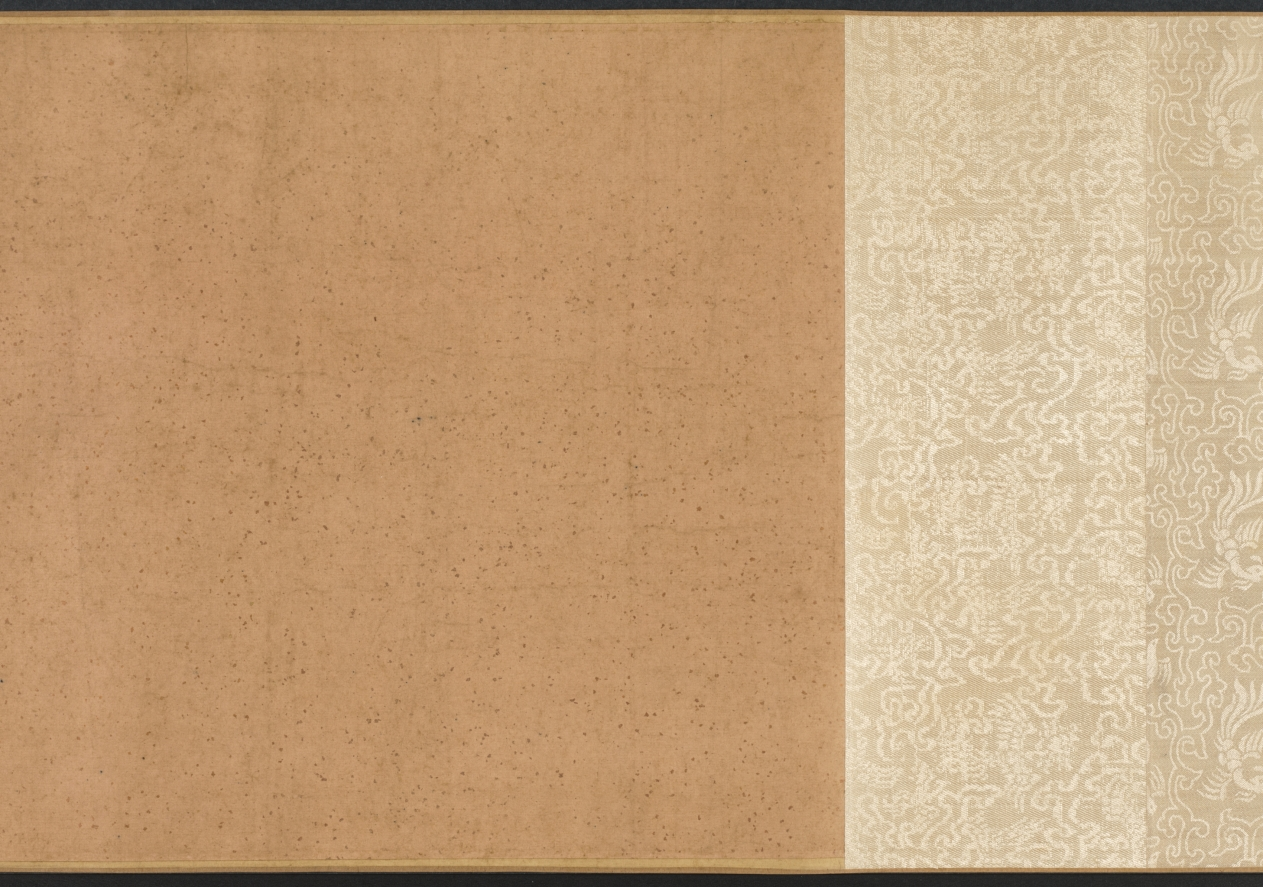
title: The Nine Elders of the Mountain of Fragrance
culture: China, Ming dynasty (1368–1644)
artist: attributed to Xie Huan (Chinese, c. 1370-c.1450)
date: 1426–52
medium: handscroll, ink and color on silk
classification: Painting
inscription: 4 seals: 2 of Xiang Yuanbian 項元汴 (1525–1590); 1 of the Qianlong Emperor (r. 1736-95); 1 of C. C. Wang 王季遷 (1907–2003)